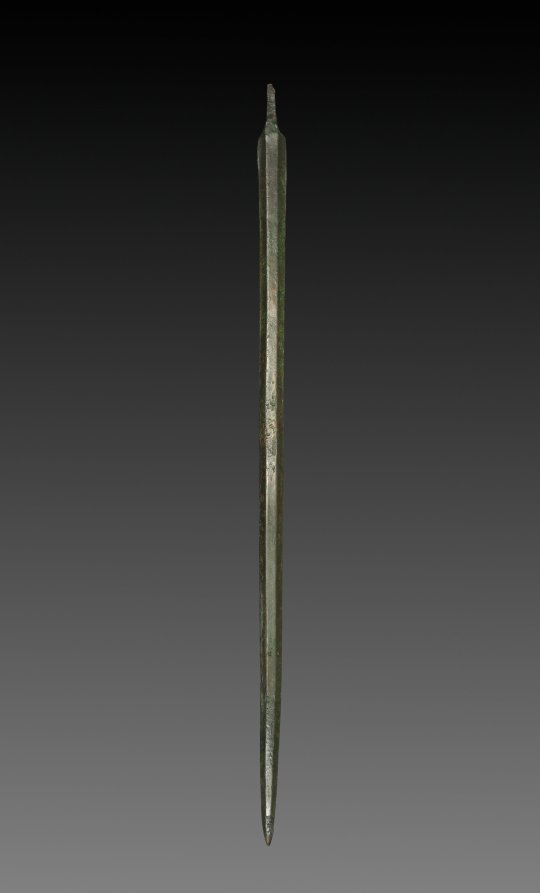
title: Sword Blade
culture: Iran, Luristan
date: 2000–1000 BCE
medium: bronze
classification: Arms and Armor